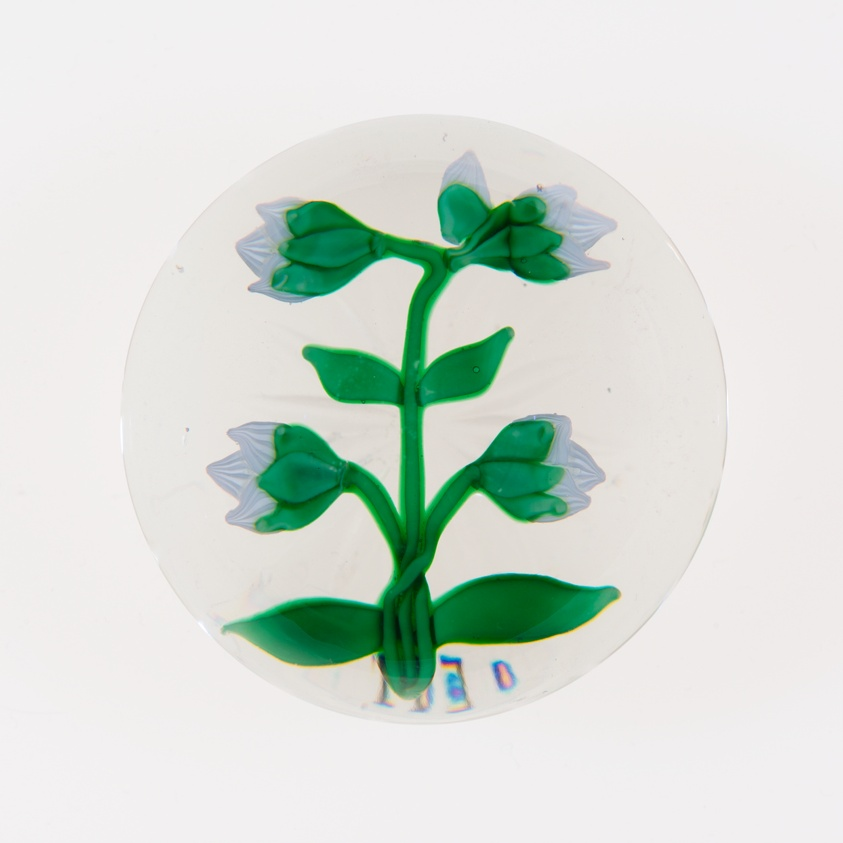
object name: Glass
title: Paperweight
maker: Baccarat Glassworks (Cristalleries de Baccarat); Lorraine, France, founded 1764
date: 19th century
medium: Glass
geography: France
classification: paperweight; glass